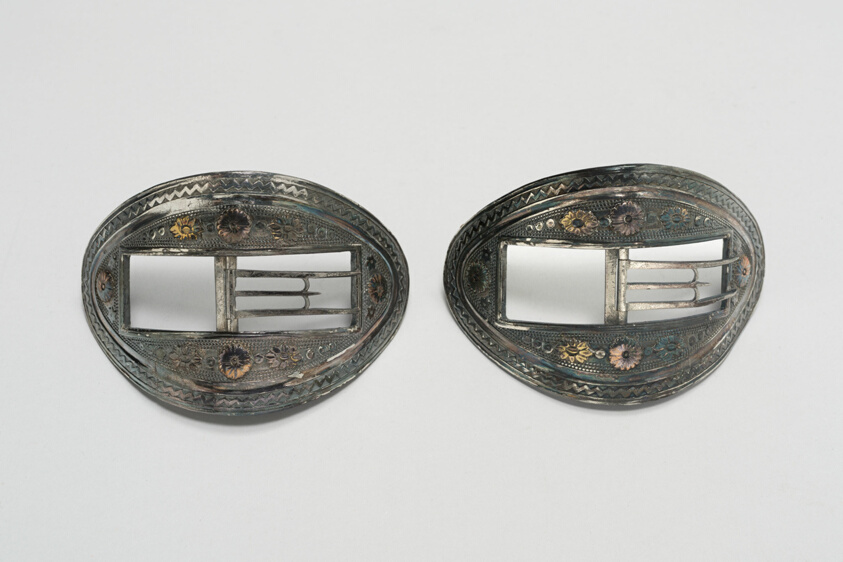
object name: Metalwork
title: Pair of Shoe Buckles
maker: England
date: Late 18th to early 19th century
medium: Steel, copper and brass plated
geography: England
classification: buckle (strap accessory); jewelry; costume accessory; european decorative arts; metalwork